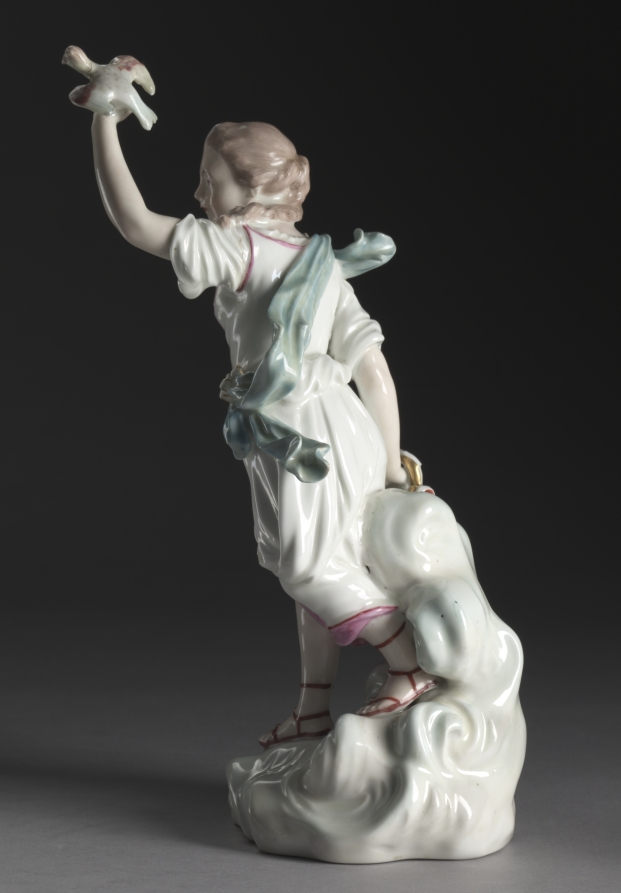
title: Air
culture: England, Derby, 18th century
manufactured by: Derby Porcelain Factory (Chelsea-Derby Period, 1770–84)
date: c. 1775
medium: soft- paste porcelain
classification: Ceramic